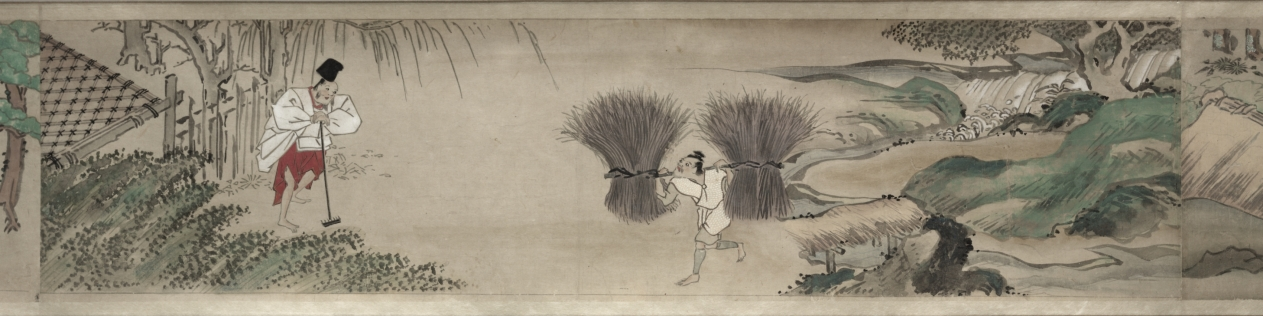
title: The Saltmaker's Story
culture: Japan, Edo period (1615–1868)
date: early 1600s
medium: One of a pair of handscrolls; ink, color, and gold on paper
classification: Painting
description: Once read and copied by girls at New Year’s celebrations and included in dowries, The Saltmaker’s Story is a rags-to-riches tale in which daughters are gifts from the gods. Despite his simple outlook, the main character progresses from humble roots as an associate at Kashima Shrine to the elite status of grandfather of the emperor through the intervention of the Kashima deity. The Saltmaker’s Story is traditionally presented in a set of three scrolls, but the text of this set has been removed by a previous owner, who remounted the illustrations as a pair. The paintings of this one take us from right to left through the first half of the tale.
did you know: This handscroll originally had texts before its paintings, but the texts were removed.